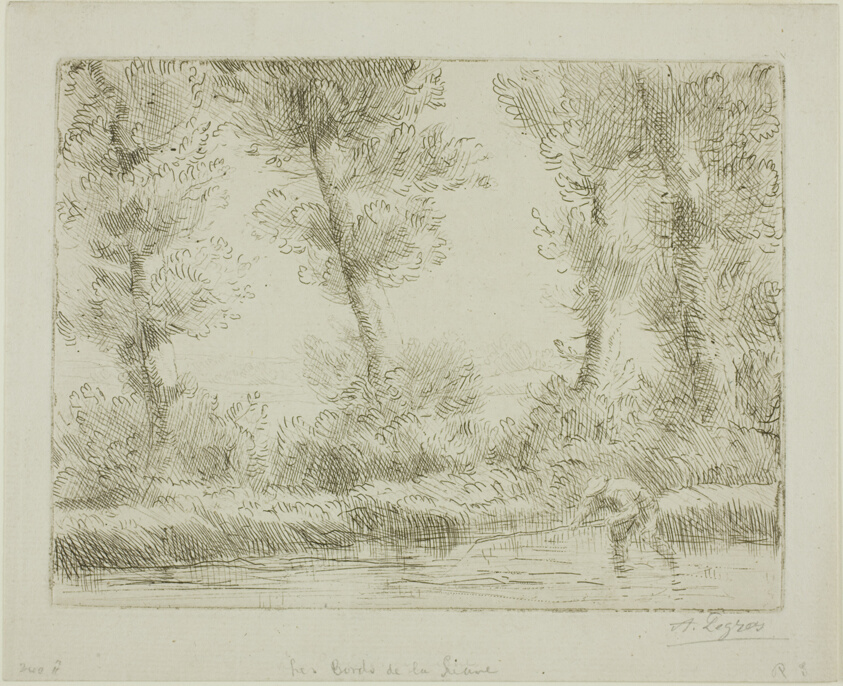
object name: Print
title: The Banks of the Liane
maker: Alphonse Legros (French, 1837-1911)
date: c. 1880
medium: Etching on ivory laid paper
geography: France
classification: etching; print; prints and drawing